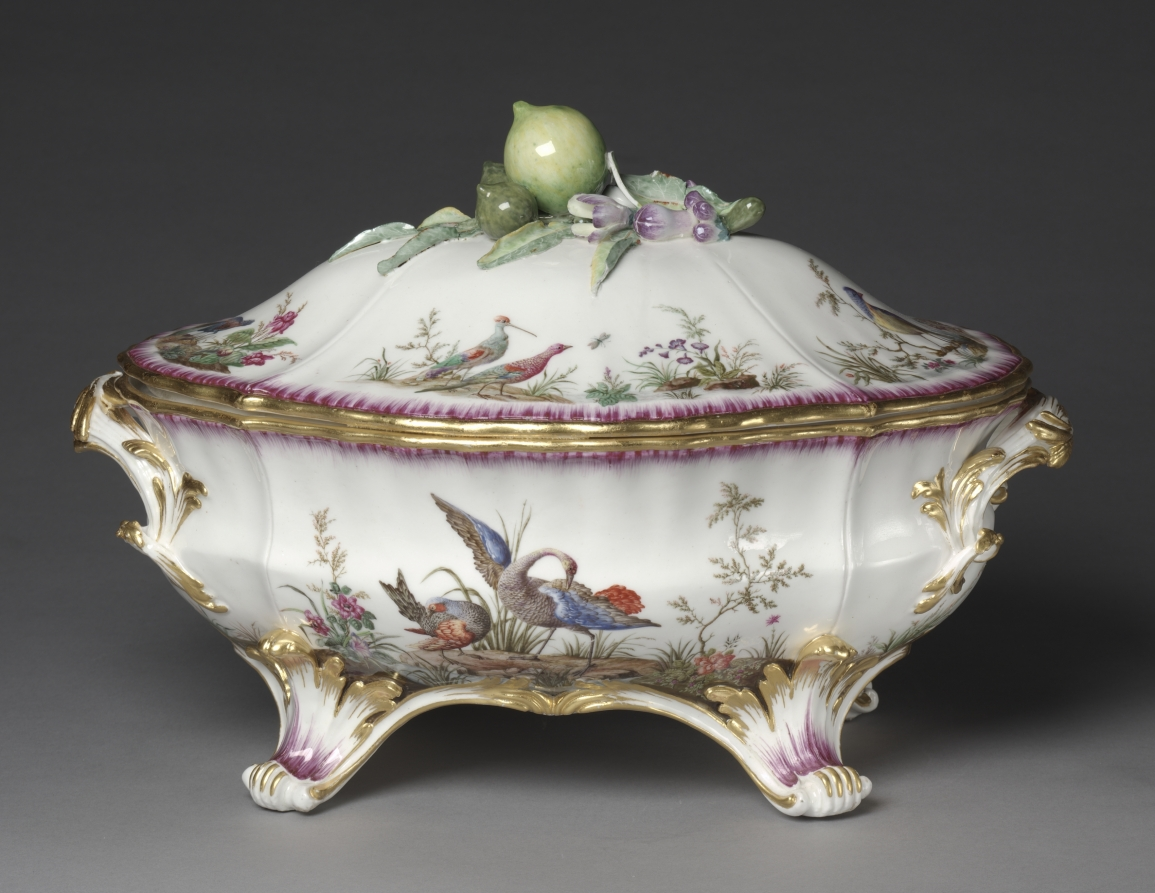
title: Covered Tureen (Terrine ancienne or Terrine ordinaire)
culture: France, Vincennes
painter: attributed to Louis-Denis Armand (French, active c. 1745–1783)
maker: Vincennes Porcelain Factory (France, 1740–56)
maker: probably by Jean-Claude Duplessis le Père (French, 1690–1774)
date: c. 1752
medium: soft-paste porcelain with enamel and gilt decoration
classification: Ceramic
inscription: [Interlaced foliate 'L's surmounted by a fleur-de-lys (indicating royal commision), in blue]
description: The intricately painted birds that decorate this tureen are the work of Louis-Denis Armand. Armand was known for his depictions of birds and landscapes, a specialty that may have come from his work as a painter of lacquered furniture with similar compositions. This tureen was likely designed by master goldsmith Jean-Claude Duplessis who began working as an artistic director at the Vincennes Porcelain Factory in 1748.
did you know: This object was manufactured in soft-paste porcelain, a material used by many European porcelain factories before they were able to emulate the hard-paste porcelain of China and Japan.